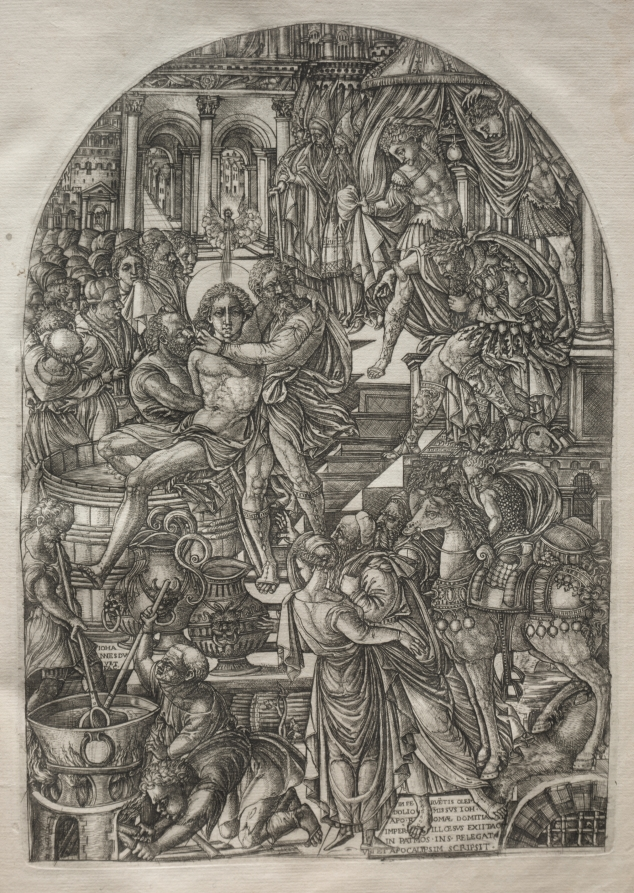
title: The Apocalypse: The Martyrdom of St. John the Evangelist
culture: France, 16th century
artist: Jean Duvet (French, 1485–1561)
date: 1546–1556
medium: engraving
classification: Print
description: This print is part of a bound volume of works illustrating the a narrative of the Apocalypse, taken from the Revelation of Saint John in the Bible. The 23 engravings in the series occupied the artist for a number of years and represent his greatest artistic achievement. The museum's volume is one of only seven known complete sets. Jean Duvet was one of the first major printmakers in France and one of the most original artists of the 1500s. Although he worked mostly in the provincial city of Langres, he became aware of Italian art through the circulation of prints—notably those of Marcantonio Raimondi. His solidly modeled human figures reflect the influence of the Italian High Renaissance. Duvet, however, developed an idiosyncratic, highly artificial style with crowded compositions that ignore rational space in favor of ornamental surface patterns.